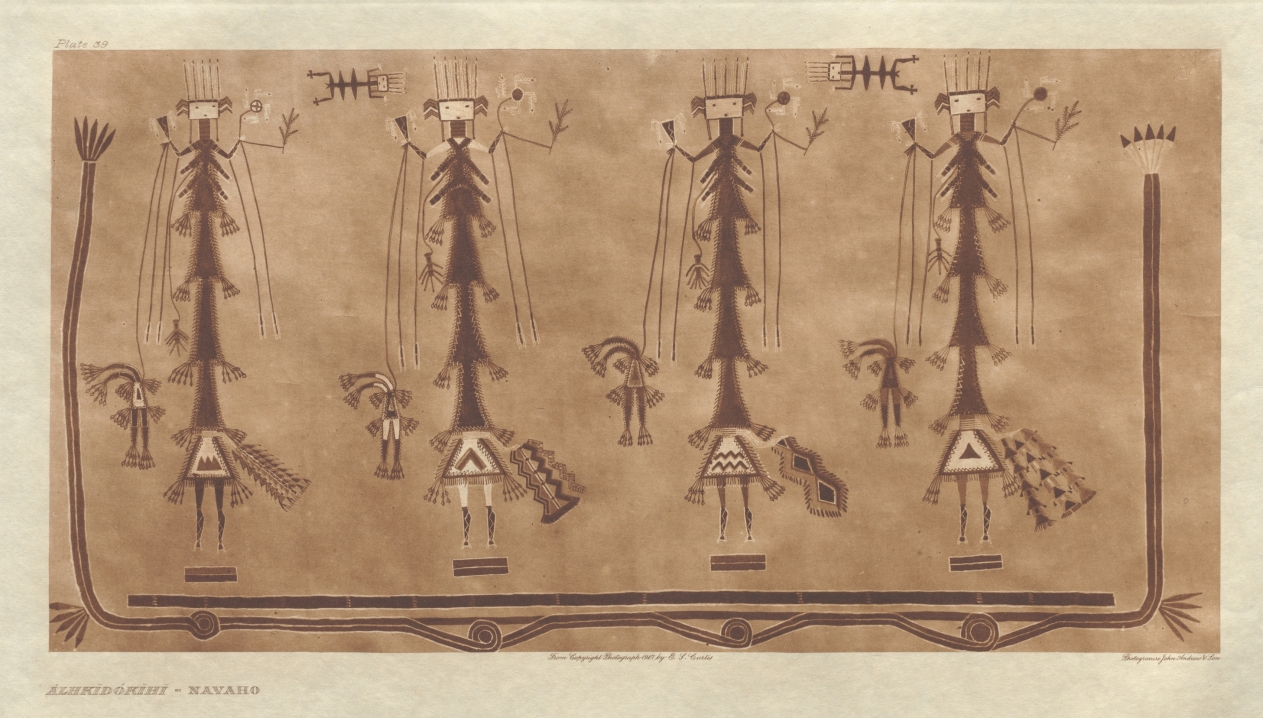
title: Portfolio I, Plate 39: Alhkidókihi-Navaho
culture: America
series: The North American Indian: being a series of Portfolios picturing and describing the Indians of the United States, the Dominion of Canada, and Alaska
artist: Edward S. Curtis (American, 1868–1952)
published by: The University Press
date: 1904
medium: photogravure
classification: Portfolio